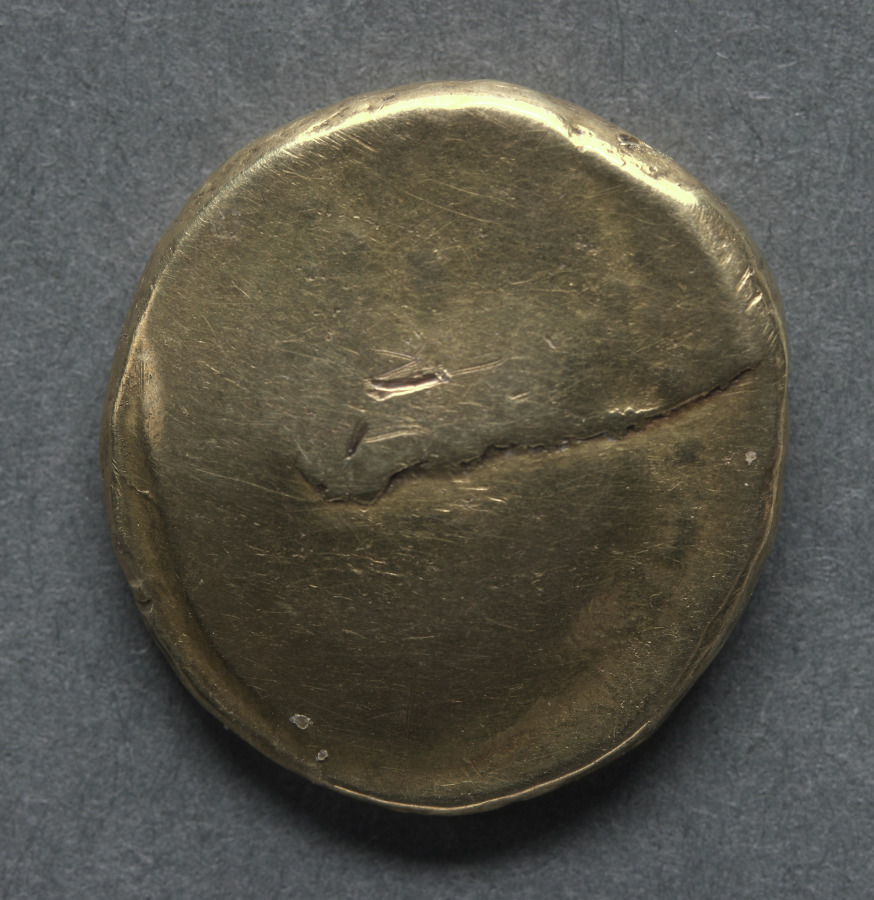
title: Stater: Plain (obverse)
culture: England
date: c. 57–45 BCE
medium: gold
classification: Coins